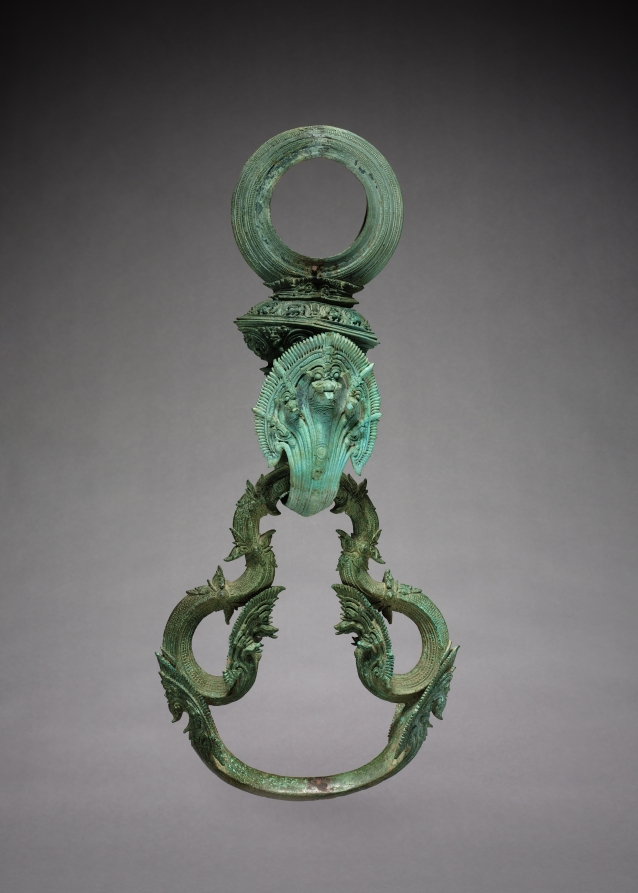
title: One of a Pair of Decorated Palanquin Hooks and Rings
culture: Cambodia, Angkor Wat Style, 12th century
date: 1100–1175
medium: bronze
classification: Sculpture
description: Hooks, suspension rings, and finials cast in bronze are very common fixtures in Cambodian decorative art. Frequently they served a practical function, such as the present set, used for a palanquin in which a person was carried from place to place. The litter or throne was fastened to the rings which in turn were suspended from the books fixed by bolts to transverse poles carried on the shoulders of the palanquin bearers. Chariots, palanquins, furniture, and harnesses were frequently embellished with various bronze decorations, finials, and fixtures. Those, as a rule, were gilded making the objects they served look very sumptuous. The relief sculpture found on various Khmer monuments, such as Angkor Wat or Bayon for instance, illustrates well the use and context of those bronze implements in ancient Cambodian life. These frequently elaborate bronze fixtures were decorated with motifs generally popular in Cambodian art: such as nagas, garudas, floral, or animal patterns. This pair of hooks and rings, unusually large in size, take on a naga form in the hooks. They are decorated with perforated floral and animal motifs done with great care and precision. The rings, suspended from hooks, are in the form of tri-fold flower stalks with naga motifs repeated at the end of the curved stalks. Such elaborate and huge hooks and rings must have, no doubt, decorated a palanquin of an important individual, possible a ruler himself. Their decoration is typical of the mature Angkor Wat style.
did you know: The naga, a water serpent with a multi-headed hood, is a Khmer national emblem.